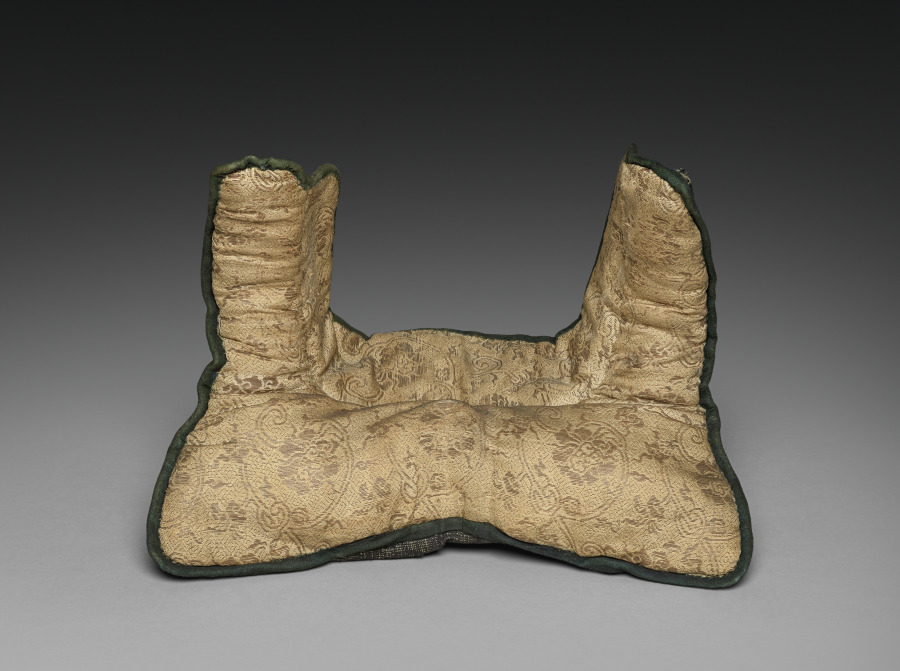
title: Collar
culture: Japan, Edo period (1615–1868)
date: 1600s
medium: Iron, lacquer, textile (silk)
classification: Arms and Armor